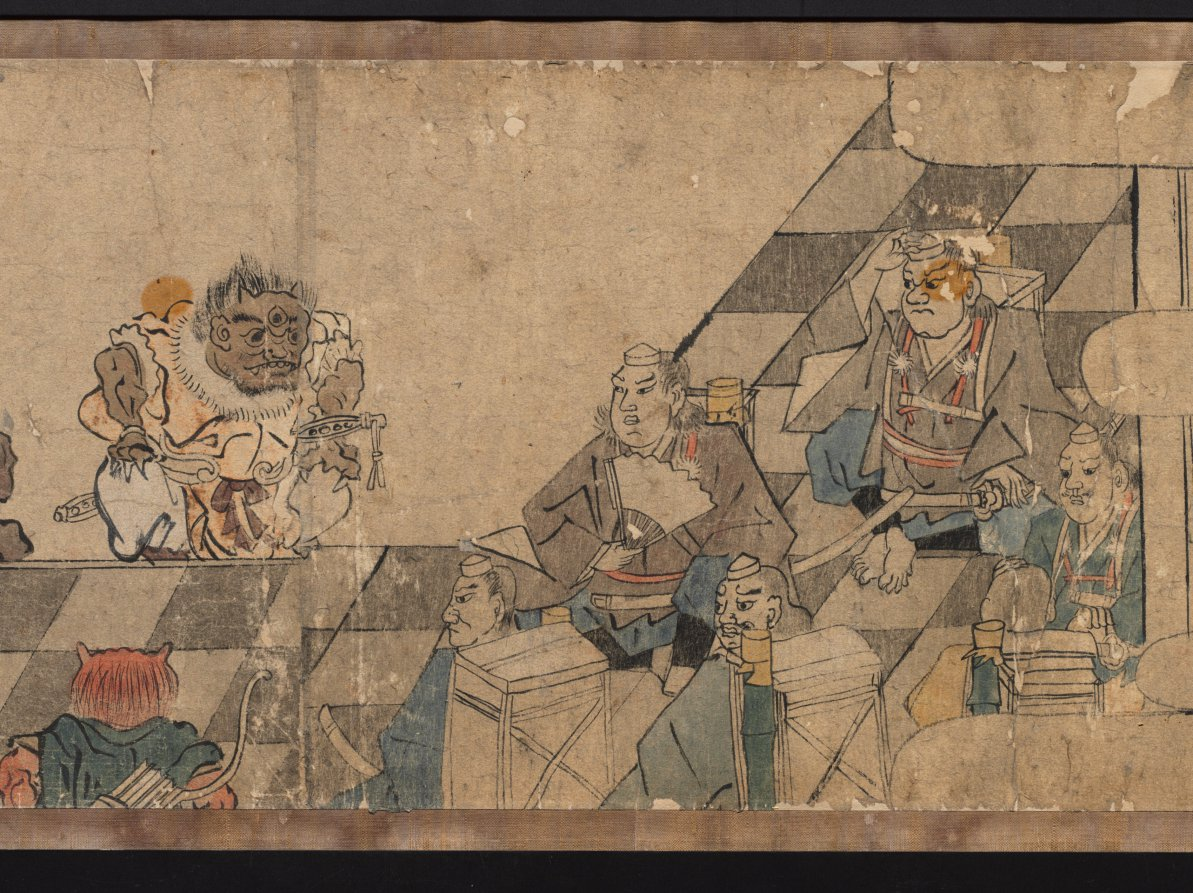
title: Oeyama Engi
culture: Japan, Edo period (1615–1868)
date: 1615–1868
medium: one of a pair of handscrolls; ink and color on paper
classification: Painting